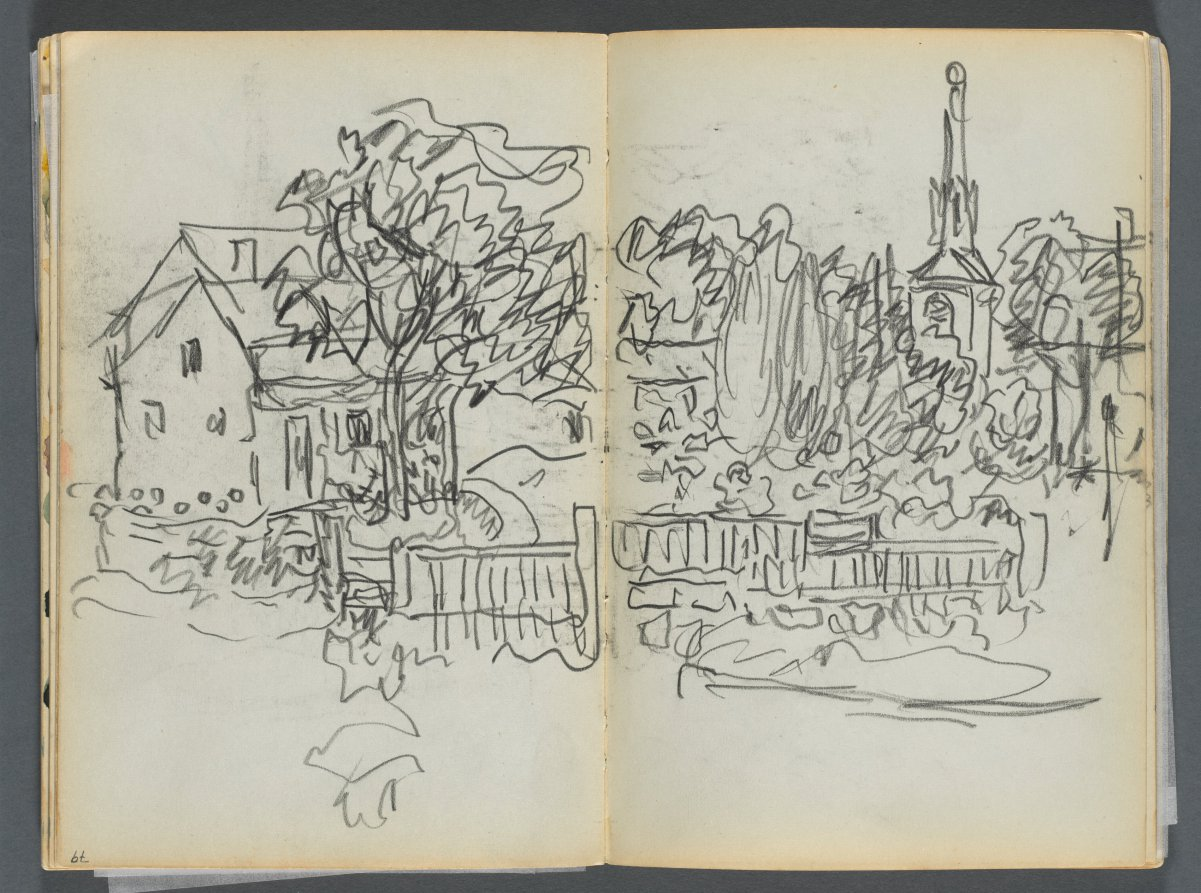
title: Sketchbook- The Granite Shore Hotel, Rockport, page 078 & 79: Village Scene with Church Spire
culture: America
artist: Maurice Prendergast (American, born Newfoundland [now Canada], 1858–1924)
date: 1905–10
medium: graphite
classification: Bound Volume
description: This sketchbook contains 72 pages of pencil drawings and 9 watercolors of Cape Ann. On the inside of the cover Prendergast wrote the address of the Granite Shore Hotel in Rockport, Massachusetts.